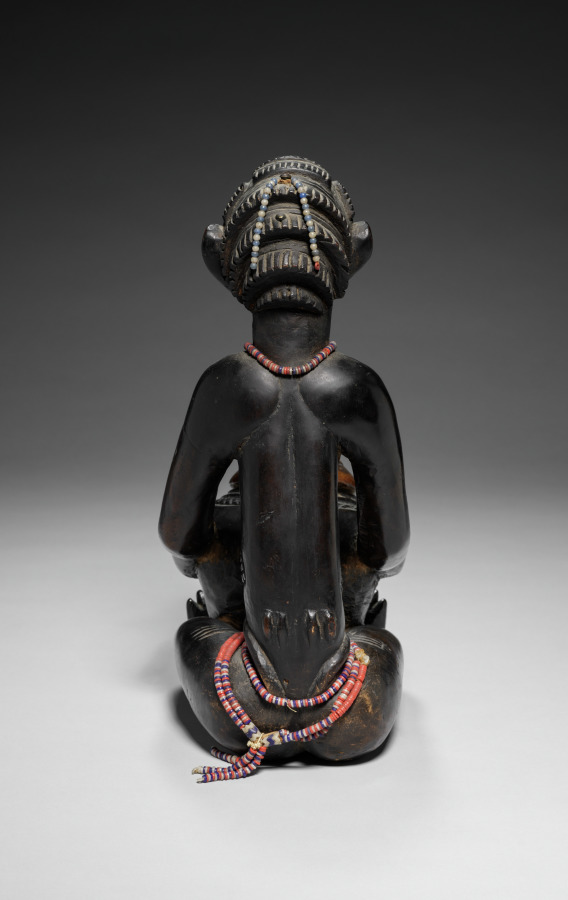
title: Female Bowl-Bearing Figure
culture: Africa, Central Africa, Democratic Republic of Congo, Luba-style carver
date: late 1800s-early 1900s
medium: Wood, glass beads, upholstery studs, plant fiber, and iron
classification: Sculpture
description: In Luba-style art, an object's beauty affects how well it works. While bowl-bearing figures had many possible uses, a royal diviner likely used this well-carved image of a woman carrying a bowl in rituals. Dusty traces of mpemba (white chalk) fleck the shining exterior and the bowl's interior, showing it once held this sacred powder. Diamond-shaped scarification marks at her waist, chest, and back add to her beauty. Her hair is carved into the cascading layered hairstyle worn in the Luba region at the turn of the twentieth century. Strands of imported glass beads encircle her waist and neck, and dangle from her hair. The alternating white and blue beads may symbolize the moon and Mbidi Kiluwe, a culture hero linked to royal practice and smithing. While much Luba-style art depicts women—who are societally important—men created and owned the majority of such works.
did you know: Symbolic of anvils, the round metal tacks decorating the figure's hair "pin" spirits and their secrets within it. They are at the hairline and each of the four hair cascades (the bottommost is now gone).